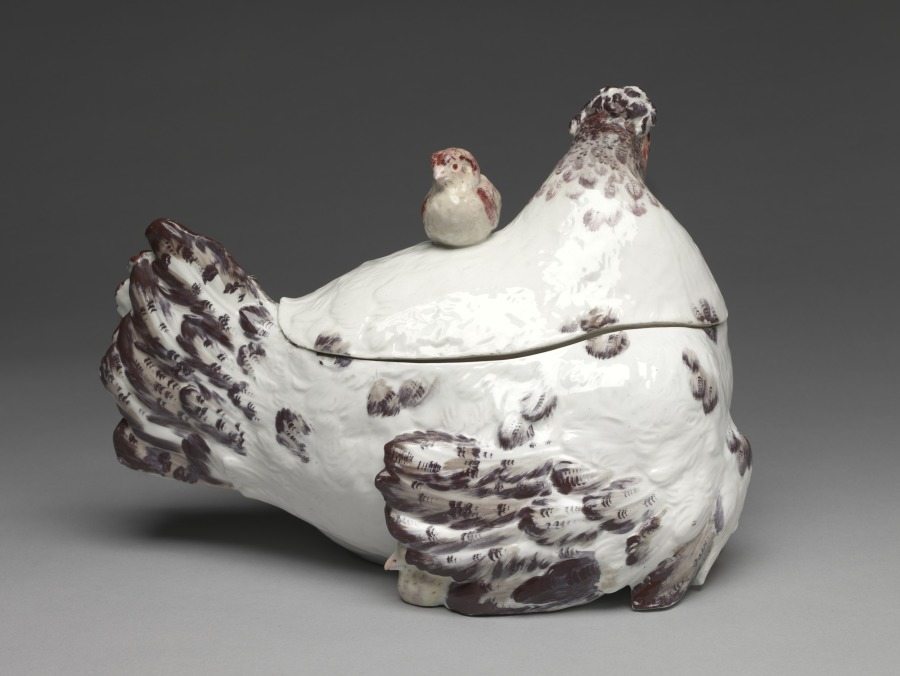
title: Hen and Chicks Covered Tureen on Stand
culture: England, London, Chelsea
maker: Chelsea Porcelain Factory (Britain, London, 1745–84)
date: c. 1755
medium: soft-paste porcelain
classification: Ceramic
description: The ceramic factory at Chelsea, located along the river Thames in western London, was Britain’s most renowned factory of decorative porcelain in the mid-1700s. Large tureens in the form of chickens or rabbits appealed to wealthy aristocrats, who took great care in developing specimen animal and poultry breeds on their country estates. The design for this particular tureen was taken from a popular seventeenth-century print by Francis Barlow depicting a farmyard.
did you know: Though the form of a soup tureen suggests a functional role at the dining table, such large, expensive porcelains were probably only used for decoration because hot liquids might have easily caused them to crack.